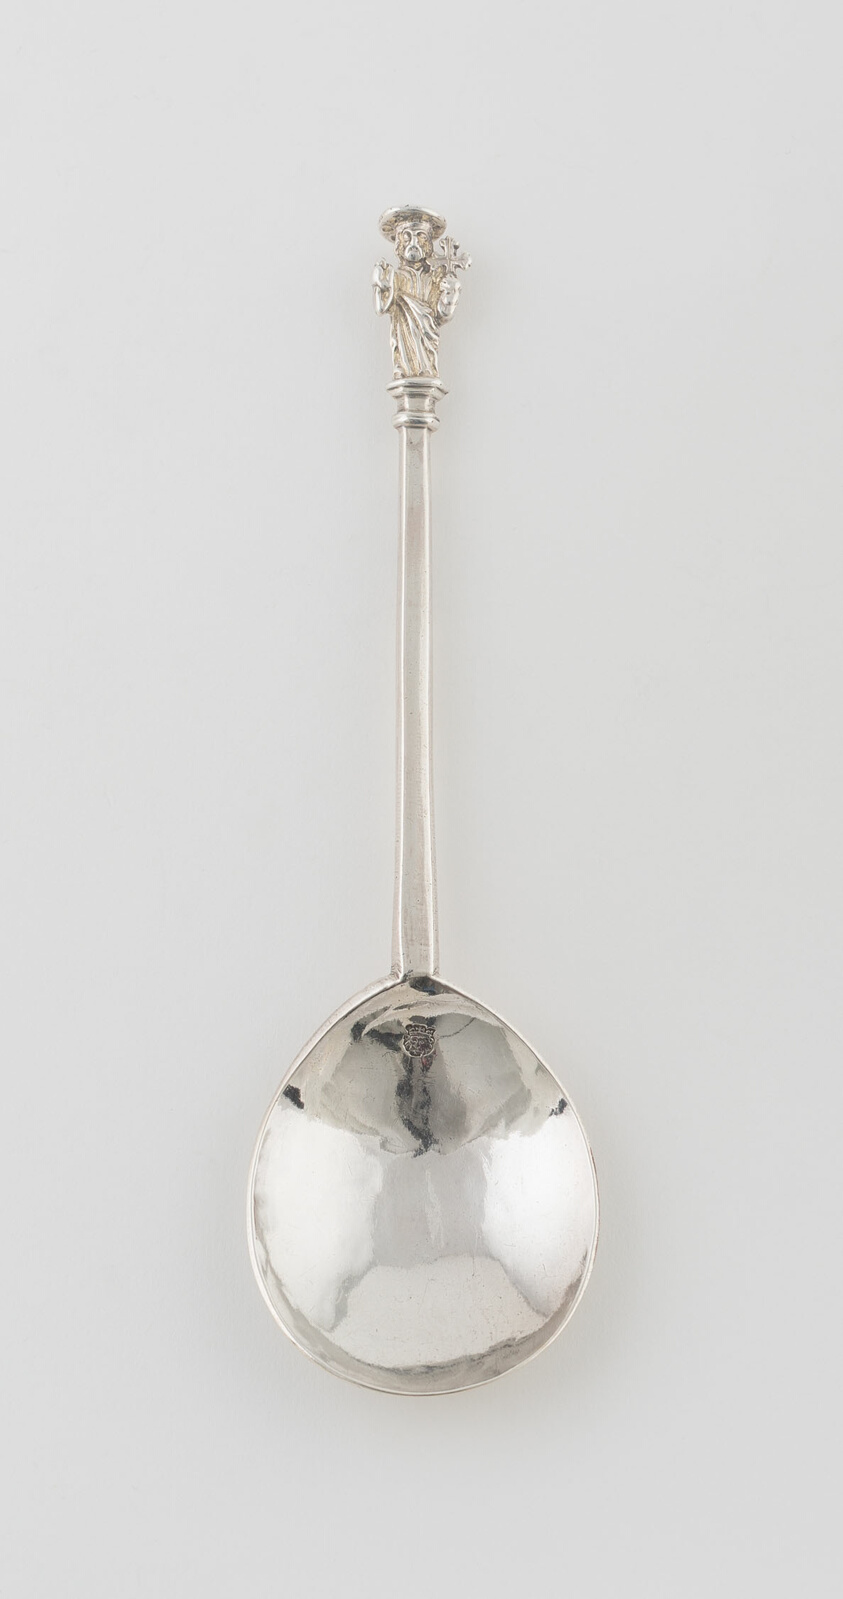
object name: Metalwork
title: Apostle Spoon: The Master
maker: London, England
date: 1628/29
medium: Silver; figure gilded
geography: London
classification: silver; metalwork; european decorative arts